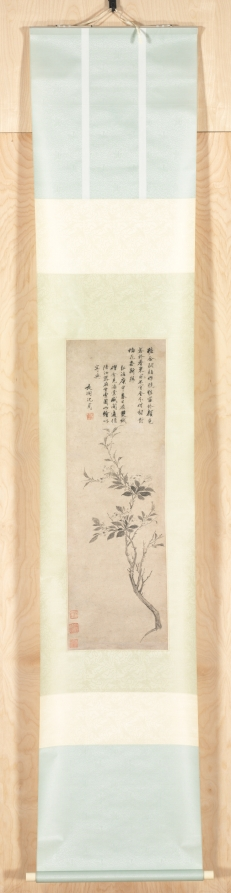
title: Flowering Crab Apple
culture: China, Ming dynasty (1368–1644)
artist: Shen Zhou (Chinese, 1427–1509)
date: 1500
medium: hanging scroll, ink on paper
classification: Painting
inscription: 粧[粉]合胭脂作曉粧，富於顔色吝於香。 東風不肯全分付，相對梅花各斷腸。 弘治庚申春日, 在雙蛾僧舍見海棠盛開, 適值陸汝器在坐索圖, 此繪以寄興。 長洲沈周 [印]啟南; 石田; 白石翁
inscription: 1 additional seal of Wu Yun 吳雲 (1811-1883).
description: Shen Zhou painted a broken branch (zhezhi 折枝) of crab apple, a fragment of nature rather than the full plant in its natural context. Shen uses calligraphic outlines in pure ink to depict the flower petals. The swift yet precise brushstrokes together with the slight S-shaped branch convey vitality. The inscription is a poem written by the artist, commenting on the lovely color and melancholic aura of the crab apple blossom. Shen Zhou is the founder of the Wu School, a group of scholars and officials active around Suzhou in eastern China, known for practicing painting and calligraphy in a refined and elegant style.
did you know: Shen Zhou painted this is an informal and rapidly done presentation picture when he was 74 years old.